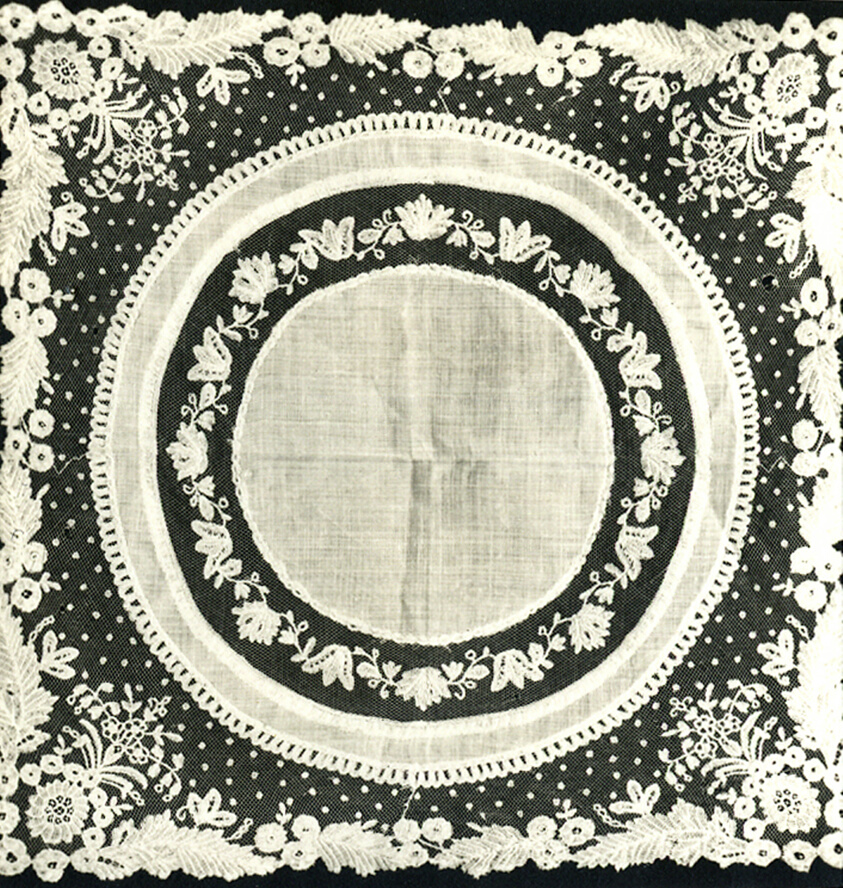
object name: Textile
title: Handkerchief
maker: Belgium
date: 1875/1900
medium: Linen, plain weave; edged with cotton and linen, mixed lace known as "Brussels application lace": bobbin and needle laces applied to machine-made net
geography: Belgium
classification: textile; lace - mixed